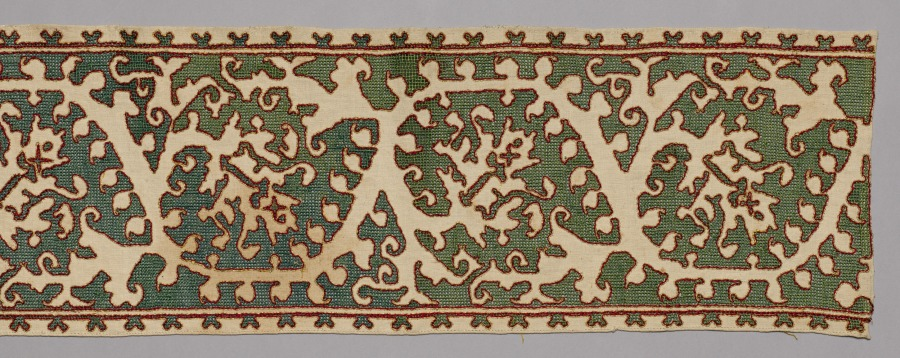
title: Embroidered Strip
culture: Italy, 17th century (copy of)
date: before 1916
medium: Linen: silk and gold filé, embroidery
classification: Embroidery